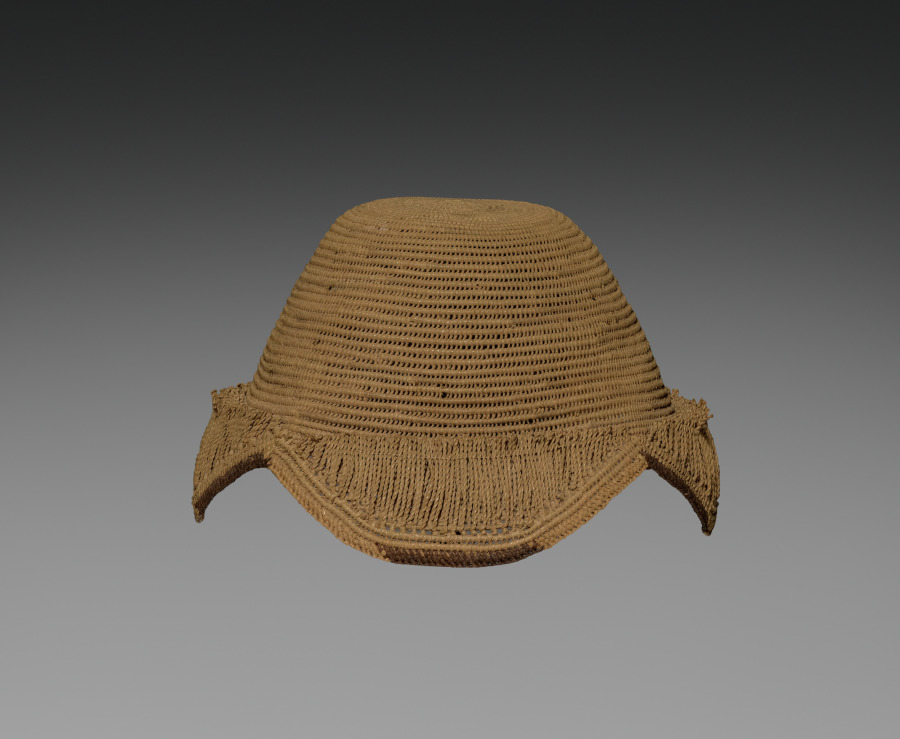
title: Hat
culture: Africa, Central Africa, Democratic Republic of the Congo, Kuba-style maker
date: early 1900s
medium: Raffia and dye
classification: Garment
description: Titled Kuba men and prominent women wear the laket, a small ornate dome-shaped hat. An essential fashion item of adult men in good social standing, it focuses special attention on the head as a significant marker of individual identity, ethnic affiliation, status, and role in society. This prestige object is secured on the crown of the head with a nine-and-a-half-inch metal pin that pierces through the hat onto a clump of hair. The laket is made from undyed raffia palm fiber that was then coiled into threads and woven. There are two examples of the laket: the plain type with the flat top, and the more elaborate type called the laket mishiing.